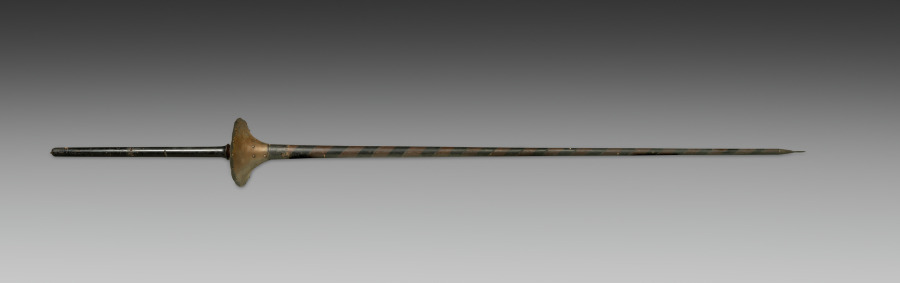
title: Tilting Lance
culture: Germany, late 19th-early 20th Century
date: c. 1875–1925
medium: steel and wood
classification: Arms and Armor